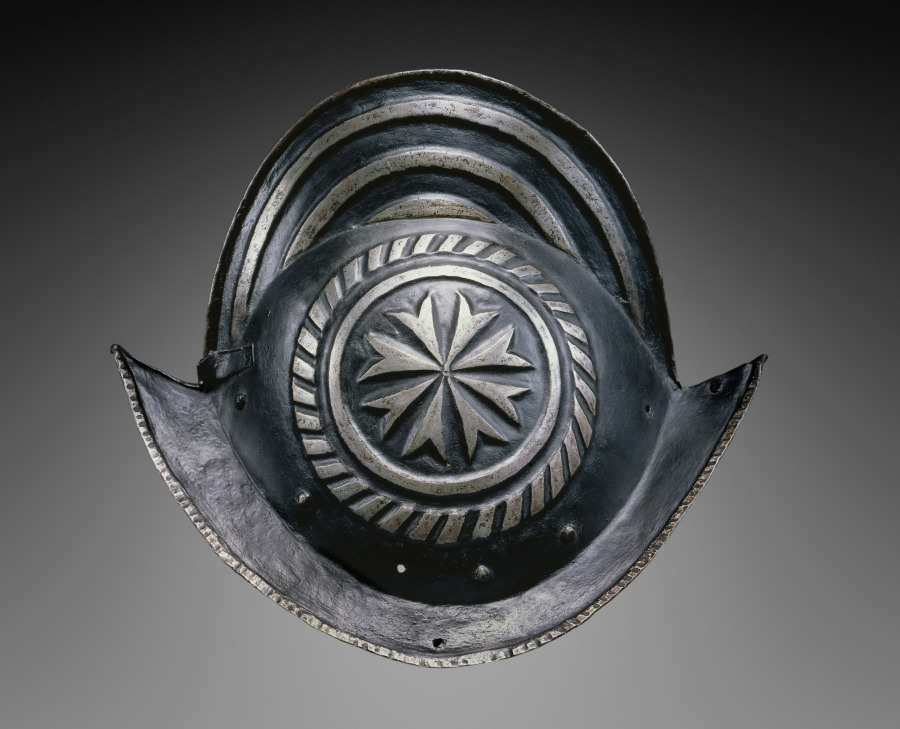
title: Black and White Morion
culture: Germany, early 17th Century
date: c. 1600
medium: steel with black paint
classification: Arms and Armor